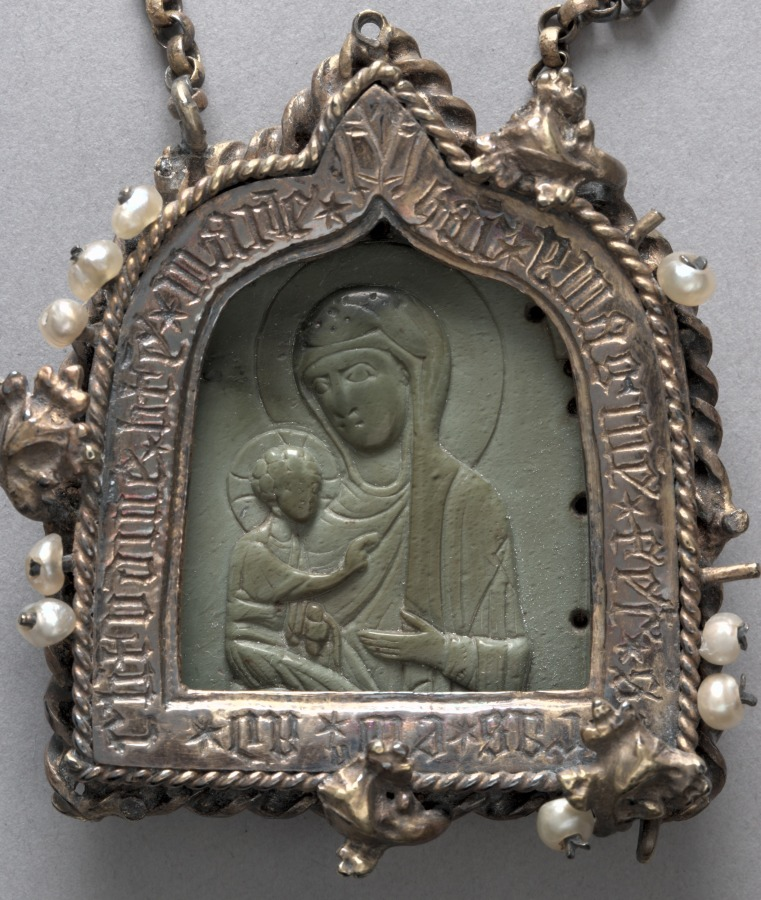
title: Pendant Icon with the Virgin "Dexiokratousa" and Frame with Winged Bull of Saint Luke on the back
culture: Byzantium (pendant); Germany, Aachen (frame), Byzantine period, 12th century (pendant); Byzantine period, 14th century (frame)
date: pendant 1100s; frame mid-1300s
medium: steatite, gilt silver, pearls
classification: Glyptic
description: This small-scale Byzantine icon depicts a half-length figure of the Virgin holding the Christ child. When the icon was mounted in its present frame by a German artist in the 14th century, it was considered to be an authentic portrait painted by Saint Luke. This claim, made in an inscription on the frame, is further emphasized by the ox, Saint Luke’s symbol, engraved on the frame’s reverse.